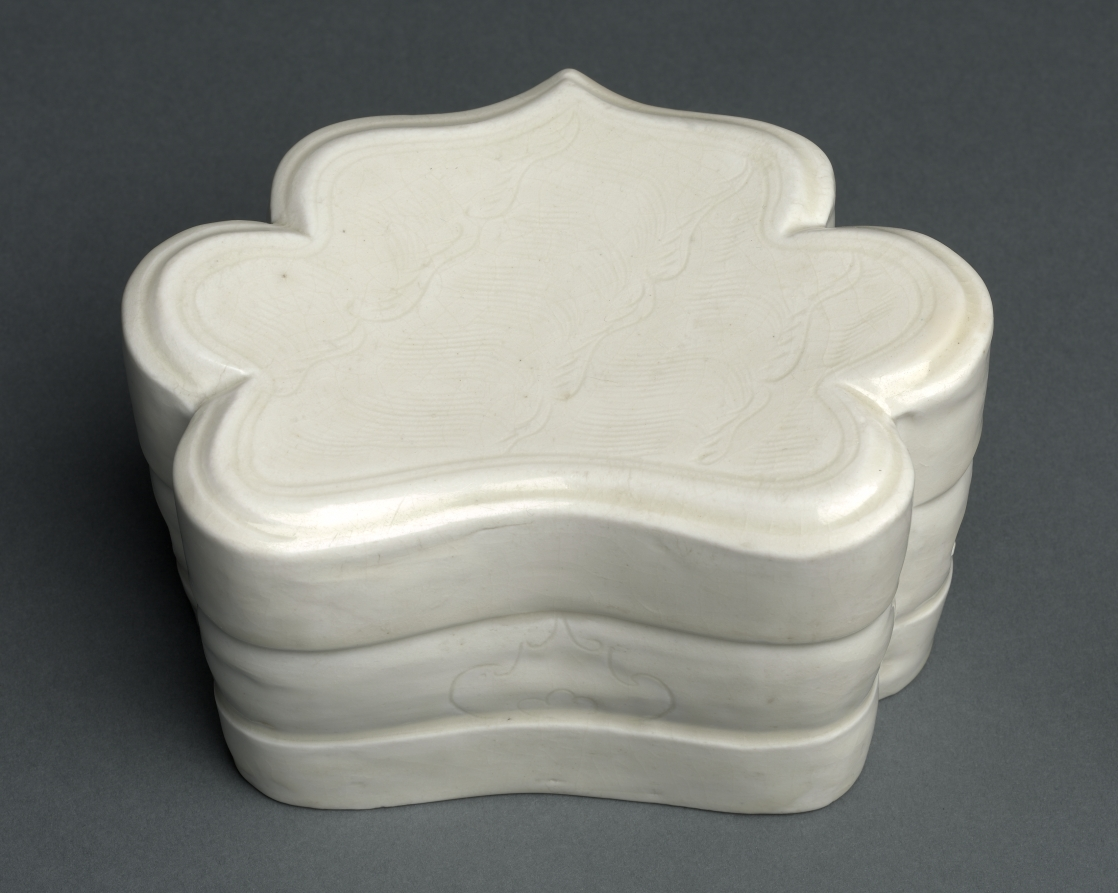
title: Cloud-Collar Pillow with Waves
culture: China, Jiangxi Province, Northern Song dynasty (960–1127)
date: 1000s–1100s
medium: glazed porcelain with incised and carved decoration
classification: Ceramic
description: This ceramic pillow in the form of a cloud—a design pattern variously referred to as ruyi, the shape of a head of an auspicious scepter—is a fine example of qingbai ware from Jiangxi province. It has a pure white body covered with a transparent, glassy glaze that carries a faint greenish tinge, thus giving it another name, yingqing, or "shadow blue." On the surface of the pillow is a carved and incised design of repeating wave patterns. The beauty of this piece lies in its elegance of form, simplicity of design, and delicacy of workmanship.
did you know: While ceramic might not be your choice for a pillow, it actually kept the user cool as they slept.